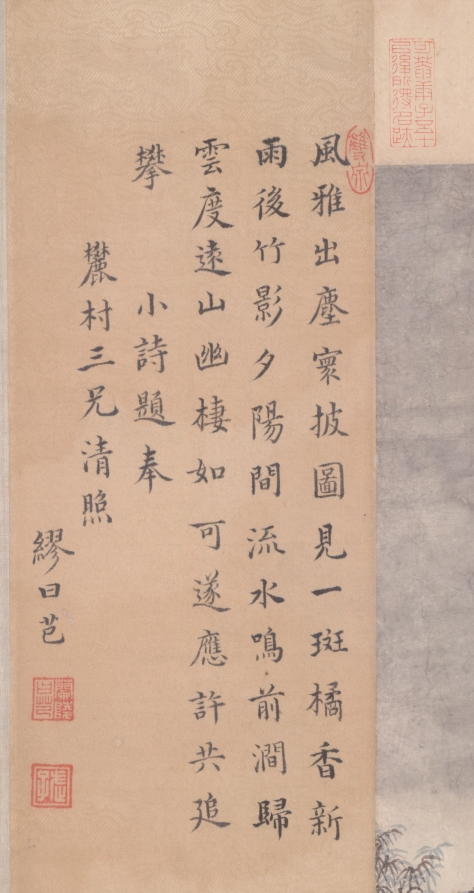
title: Portrait of An Qi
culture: China, Qing dynasty (1644-1911)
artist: Wang Hui (Chinese, 1632–1717)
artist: Tu Luo (Chinese, active c. 1715)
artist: Yang Jin (Chinese, 1644–1728)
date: 1715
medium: hanging scroll; ink and color on paper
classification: Painting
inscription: [印]上下千年. 麓村高逸：康煕乙未季春，廣陵涂洛寫照，海虞楊晉布景，八十四叟王翬補竹石。[印]耕煙; 王翬之印.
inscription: 俯視塵寰逸韻高，襟懷潚灑興偏豪。/ 琴書座右親風雅，竹石池邊拭羽毛。/ 蕉葉亂雲遮北礀，鶴翎凝雪戀東皋。/ 翩翩度量如君少，靜對秋江萬斛濤。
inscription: 知君頗好道，作意洗緐縟。/ 遂窮林亭勝，翛然契幽獨。/ 自得會忘言，餘善時往復。/ 岸幘若有期，把卷一停讀。/ 鶴馴行載正，雲閑斷還續。/ 橘柚欎寒煙，芭蕉瀉深綠。/ 石橋逕屢迴，暗水流亦曲。/ 真心恣奇探，曠景縱遐矚。/ 陶謝不可作，此旨更誰屬。/ 眷焉展斯圖，令我怡心目。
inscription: 逸興迥絶塵，風流仰高躅。/ 側無鹿角巾，横呈豹皮褥。/ 胸藏山壑富，座列琴囊足。/ 橙懸萬顆黄，蕉散一叢綠。/ 泉清鶴景長，樹遠雲光續。/ 披圖識性情，伊人温似玉。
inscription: 風雅出塵寰，披圖見一斑。/ 橘香新雨後，竹影夕陽間。/ 流水鳴前澗，歸雲渡遠山。/ 幽棲如可遂，應許共追攀。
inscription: 蕭灑披襟坐，琴書逸興長。/ 衫分蕉葉碧，冠學竹皮黄。/ 高樹穿雲斷，流泉帶菊香。/ 幽懷真曠達，何地不羲皇。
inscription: 秋色滿林壑，孤琴獨玄閒。/ 境歸簪紱外，道在水雲間。/ 棄智如藏璞，栖心静若山。/ 看君此圖畫，永以謝塵顏。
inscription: 修竹叢蕉坐綠天，君容早歳已如仙。/ 山中寄謝王摩詰，頭白方知住輞川。/ 千樹勝封萬戸侯，西風載滿李衡舟。/ 看君高致輕軒冕，坐享江鄉富貴秋。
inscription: 6 seals unidentified.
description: An Qi, the subject of the portrait, was a second-generation salt merchant from Korea. He used part of his wealth to collect art. At the time this painting was commissioned, An was less than 40 years old. He is represented as a Daoist recluse in nature, informally dressed with attributes such as books and a wrapped guqin instrument, a portrait convention for literati-scholars since the Six Dynasties period (220–589 CE). The local Taihu rock, banana plants, and crane suggest a southern garden and a life in seclusion. An’s portrait is evidence of merchants aspiring to the scholar-official class. According to the inscription, this painting was the joint effort of three men, the eldest and most famous was Wang Hui. While the garden setting is homogenous in style, it contrasts with the application of opaque pigments and shading employed for the depiction of An Qi’s face.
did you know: Seven of An Qi's close friends wrote poetic inscriptions on the silk brocade mount around his portrait.